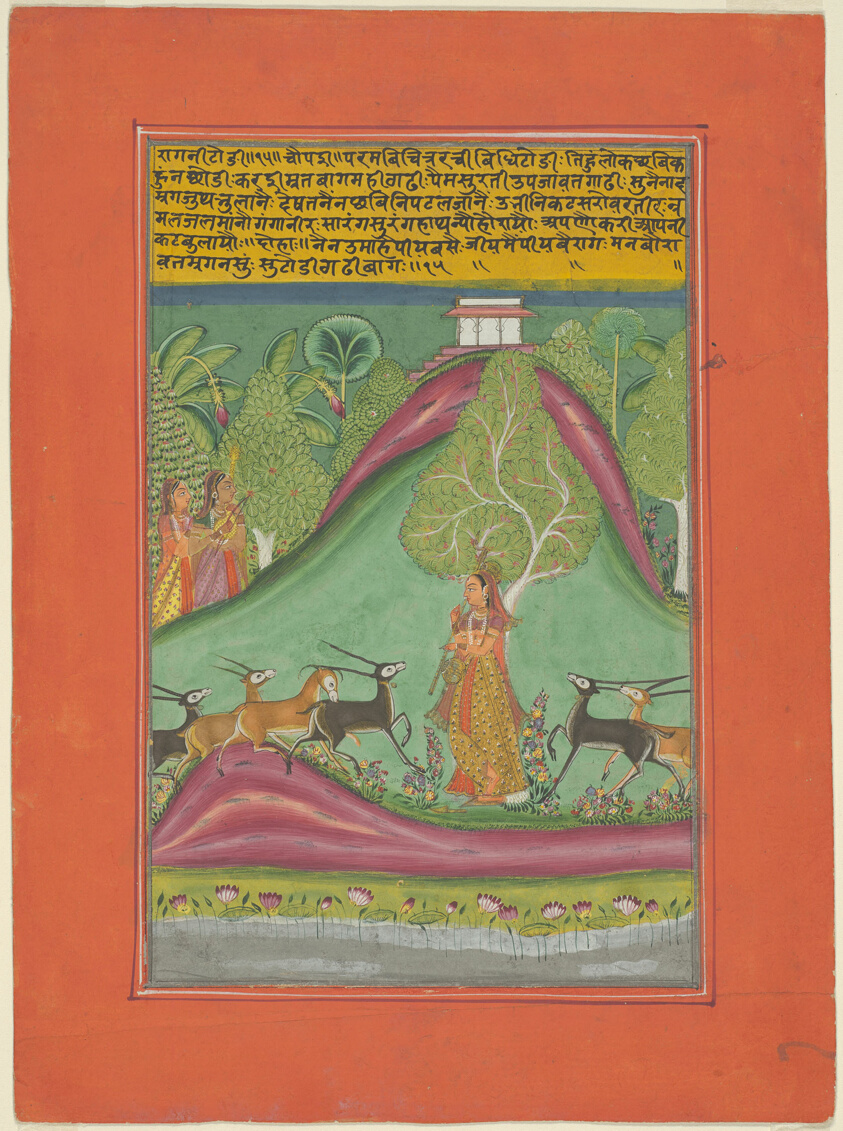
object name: Painting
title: Ragini Todi, Page from a Jaipur Ragamala Set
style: South Asian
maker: India; Rajasthan, Jaipur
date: c. 1750-1770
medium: Opaque watercolor on paper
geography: Rajasthan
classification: miniature painting; painting; asian art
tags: music, musicians